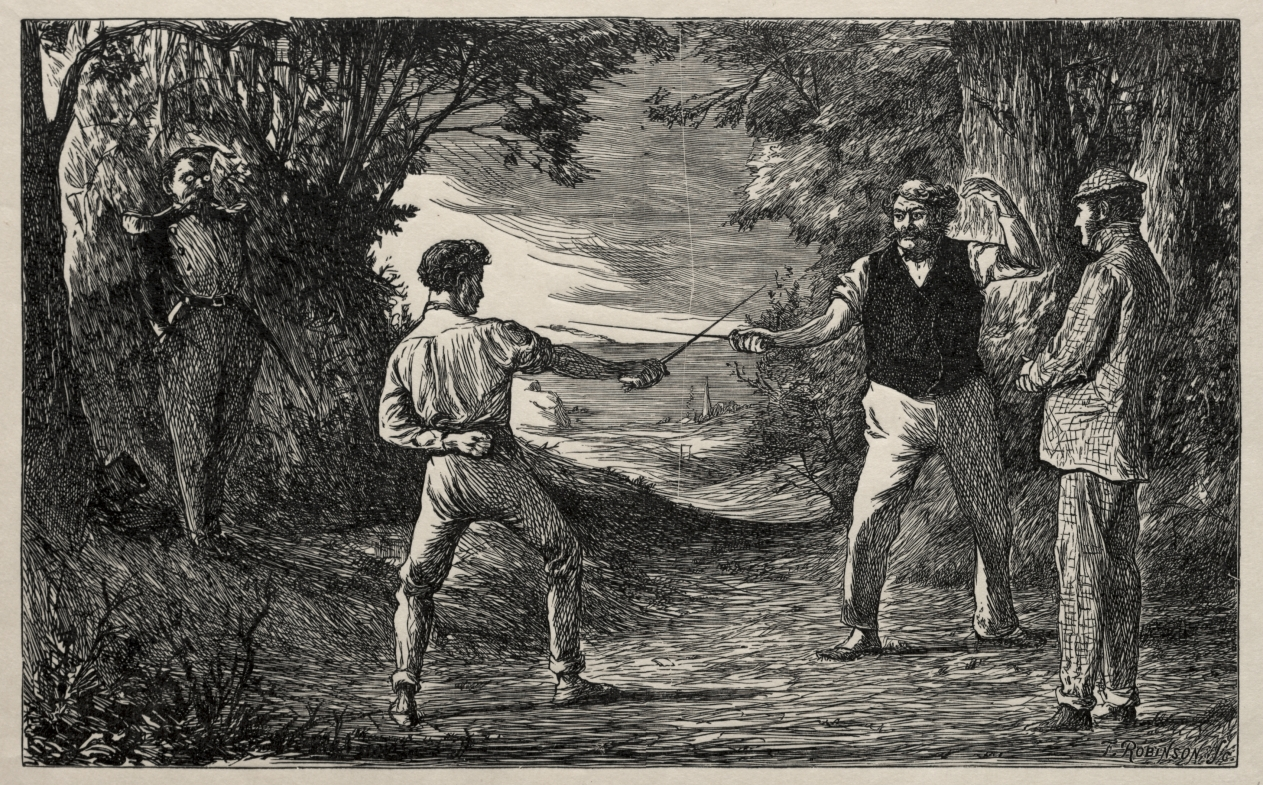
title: The Ingenuous Wobbler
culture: England, 19th century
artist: George Louis Palmella Busson Du Maurier (British, 1834–1896)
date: 1865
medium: wood engraving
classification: Print